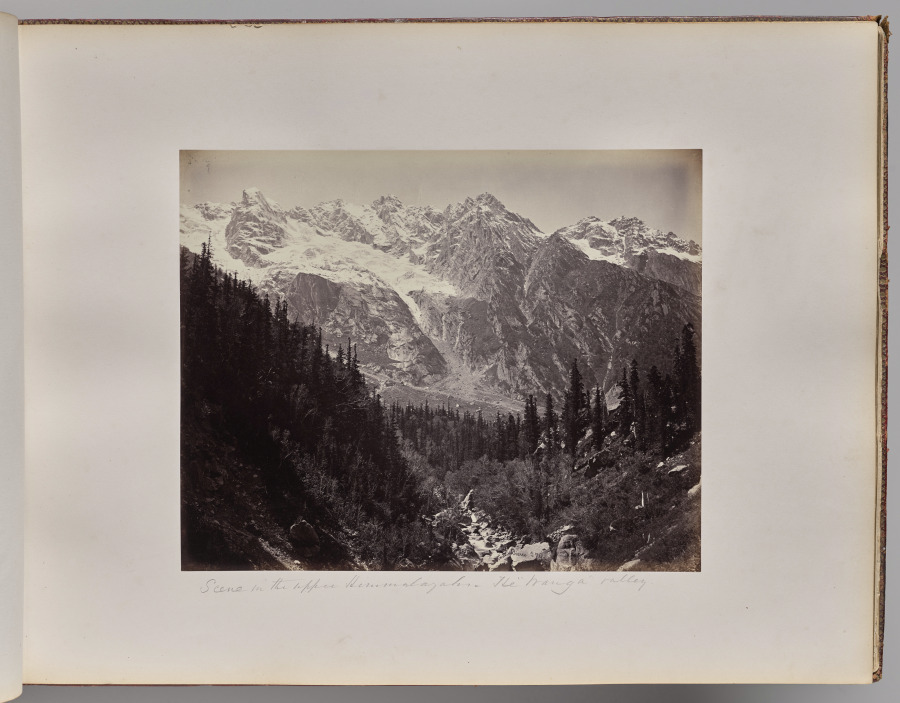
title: Scene in the Upper Himmalayahs. View in the Manga Valley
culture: England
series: Photographs of Northern India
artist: Samuel Bourne (British, 1834–1912)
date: 1863–70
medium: albumen print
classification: Photograph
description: The 50 images in this album, all taken in the 1860s, move from the hill towns of the Himalayas down to cities including Lahore (now in Pakistan), Delhi, Lucknow, Agra, Benares (now Varansi), and Calcutta (now Kolkata). Architectural studies of major monuments offer valuable historical records of what sites such as the Taj Mahal and the imperial mosque of the Mughal emperors in Delhi looked like before twentieth-century restorations.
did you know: Samuel Bourne, the author of most the images in this album, was a banker in England before he moved to India to become a professional photographer.